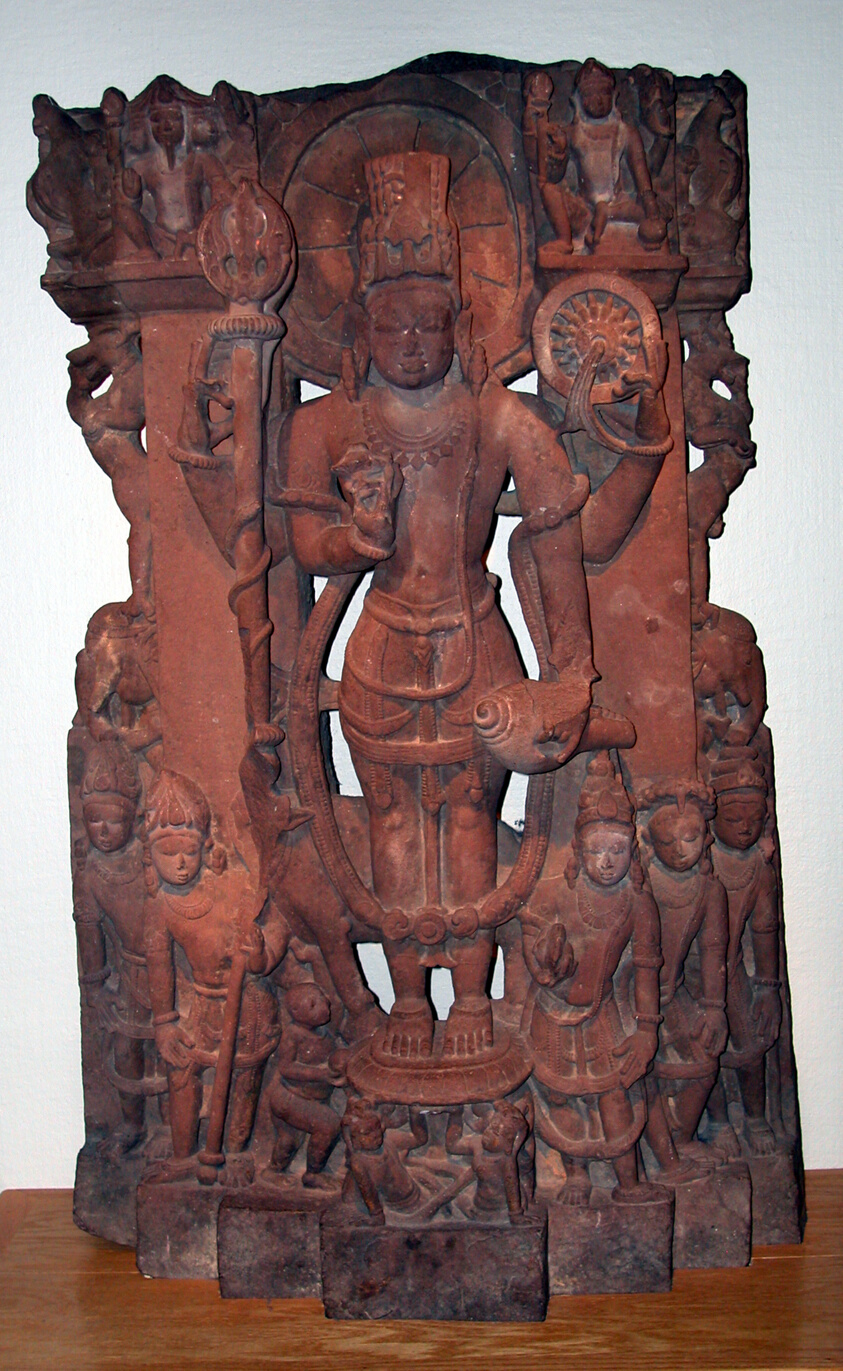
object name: Sculpture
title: God Harihara (Half-Vishnu, Half-Shiva)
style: South Asian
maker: India; Madhya Pradesh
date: 9th century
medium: Sandstone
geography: Madhya Pradesh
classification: stone (unidentified); stone; sculpture; asian art